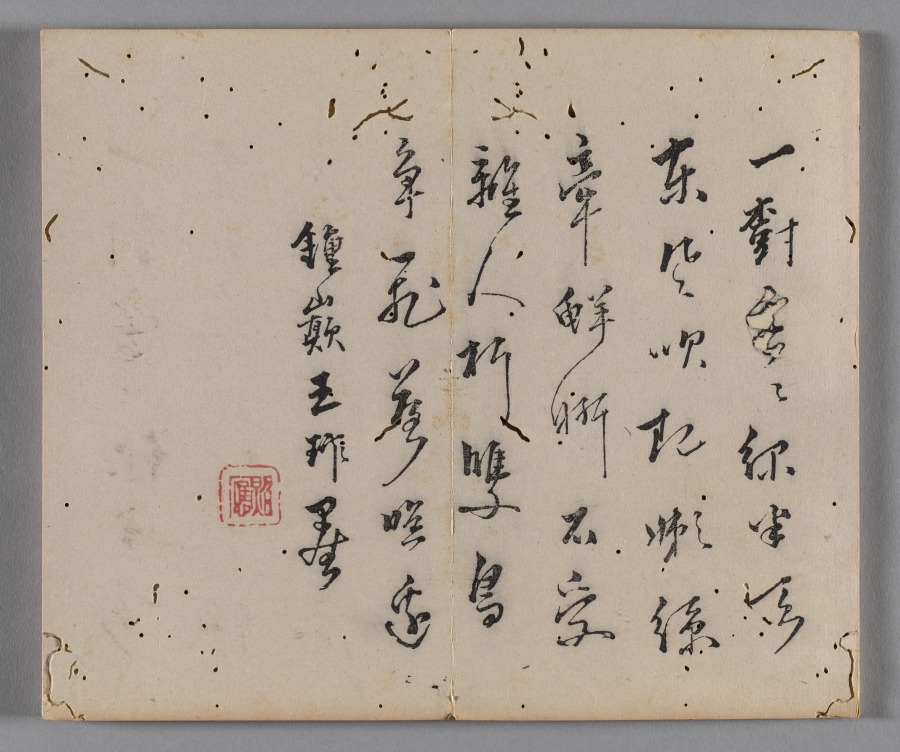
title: Ten Bamboo Studio Painting and Calligraphy Handbook (Shizhuzhai shuhua pu): Birds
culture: China, Qing dynasty (1644-1911)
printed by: Hu Zhengyan (Chinese, c. 1584–1674)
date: 1633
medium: Woodblock-printed book; ink and colors on paper; first edition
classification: Print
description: Color printing reached a level of perfection in the early 1600s, as seen in this Ten Bamboo Studio Collection of Calligraphy and Painting and the Mustard Seed Garden Manual of Painting (printed 1679 and 1701). The painterly quality, precision in registering (aligning) the woodblocks, and harmonious colors made them the most successful color print editions in Chinese history. Both editions were printed and compiled in Nanjing, spread nationwide, and had a great impact on the arts in Japan and Korea.